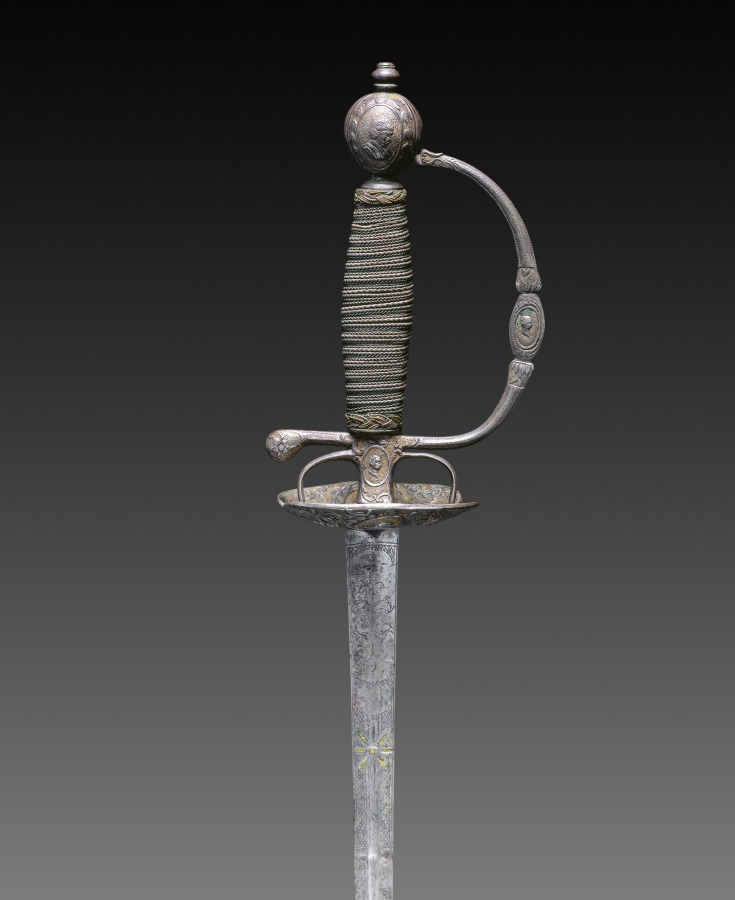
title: Small Sword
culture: France, Paris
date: c. 1750–1770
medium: steel, gilded with wood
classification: Arms and Armor